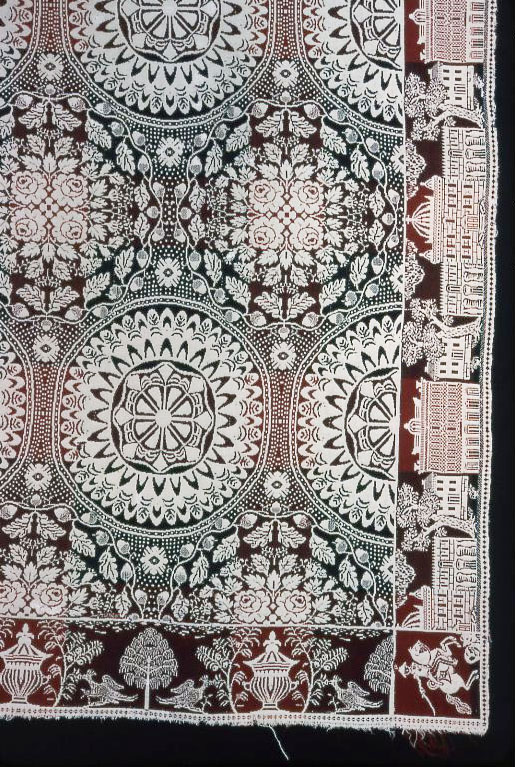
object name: Textile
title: Coverlet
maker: United States, Ohio, Near Marietta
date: 1840/45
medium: Cotton and wool, plain weave double cloth; woven on loom with Jacquard attachment; two loom widths joined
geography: Ohio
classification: textile; coverlet; weaving - coverlet; weaving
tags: coverlet